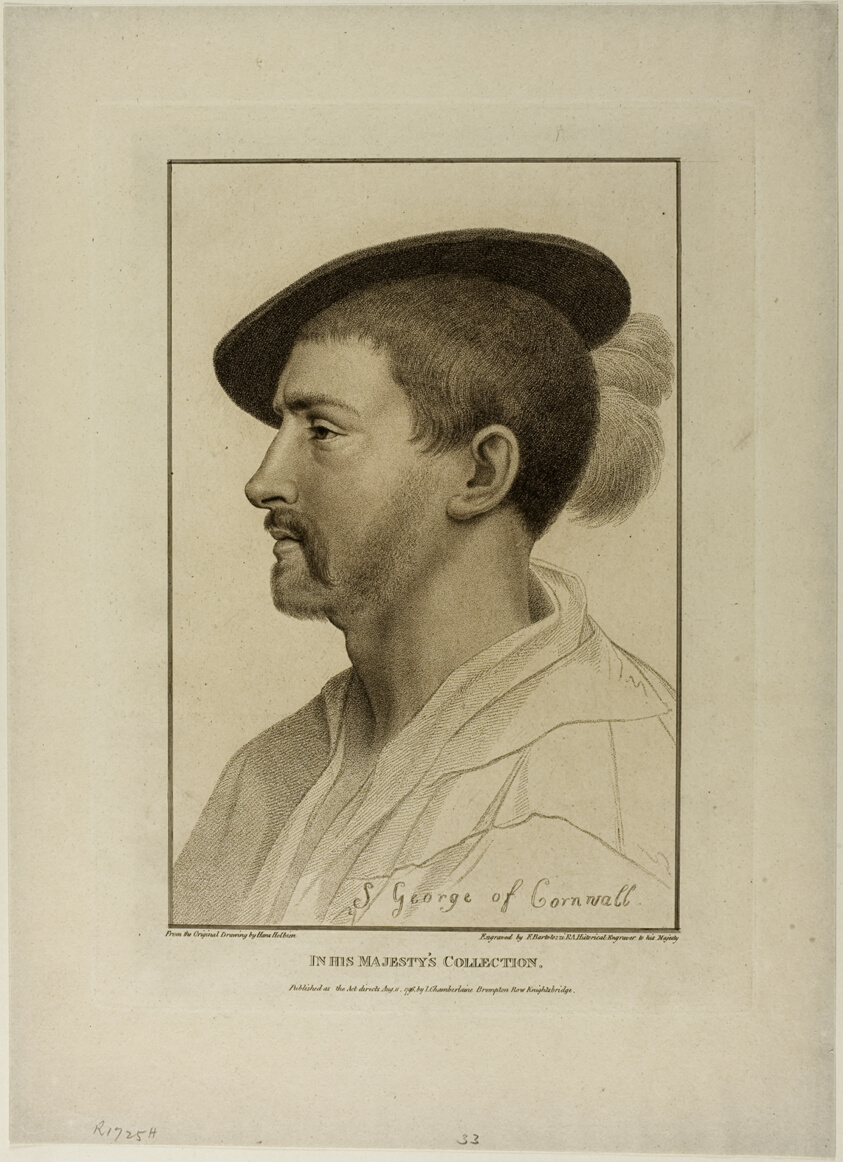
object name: Print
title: Sir Simon George (of Cornwall)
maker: Francesco Bartolozzi (Italian, 1727-1815); after Hans Holbein the younger (German, 1497-1543)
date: August 11, 1796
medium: Stipple engraving on cream wove paper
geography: Italy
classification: engraving; print; prints and drawing